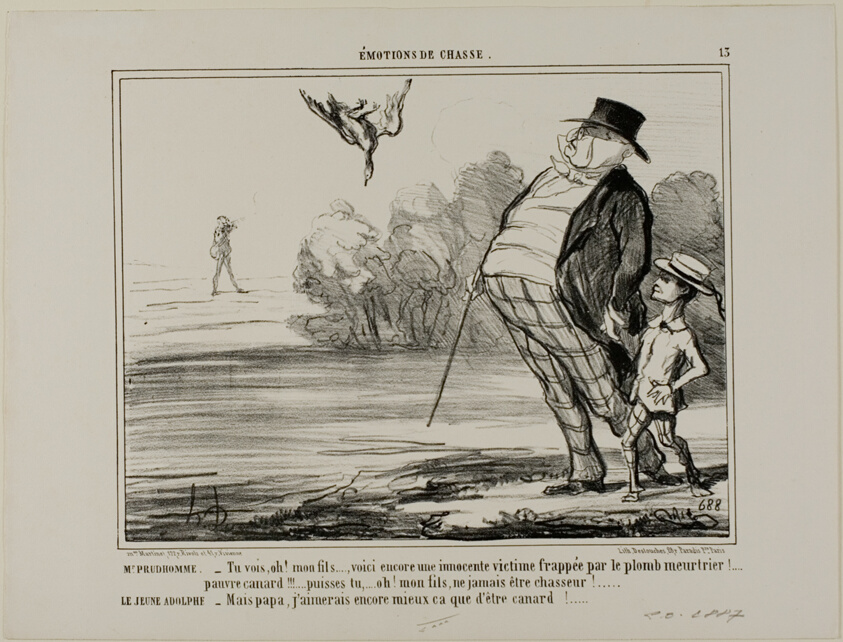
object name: Print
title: Mr. Prudhomme: “There you are again, my son... another innocent victim of the murderous lead.... poor little duck... pray, you never shall become a hunter, my son!” Young Adolph: “But Daddy, I'd rather like to be a hunter than a dead duck!,” plate 13 from Émotions De Chasse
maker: Honoré Victorin Daumier; French, 1808-1879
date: 1858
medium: Lithograph in black on white wove paper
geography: France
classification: lithograph; print; prints and drawing